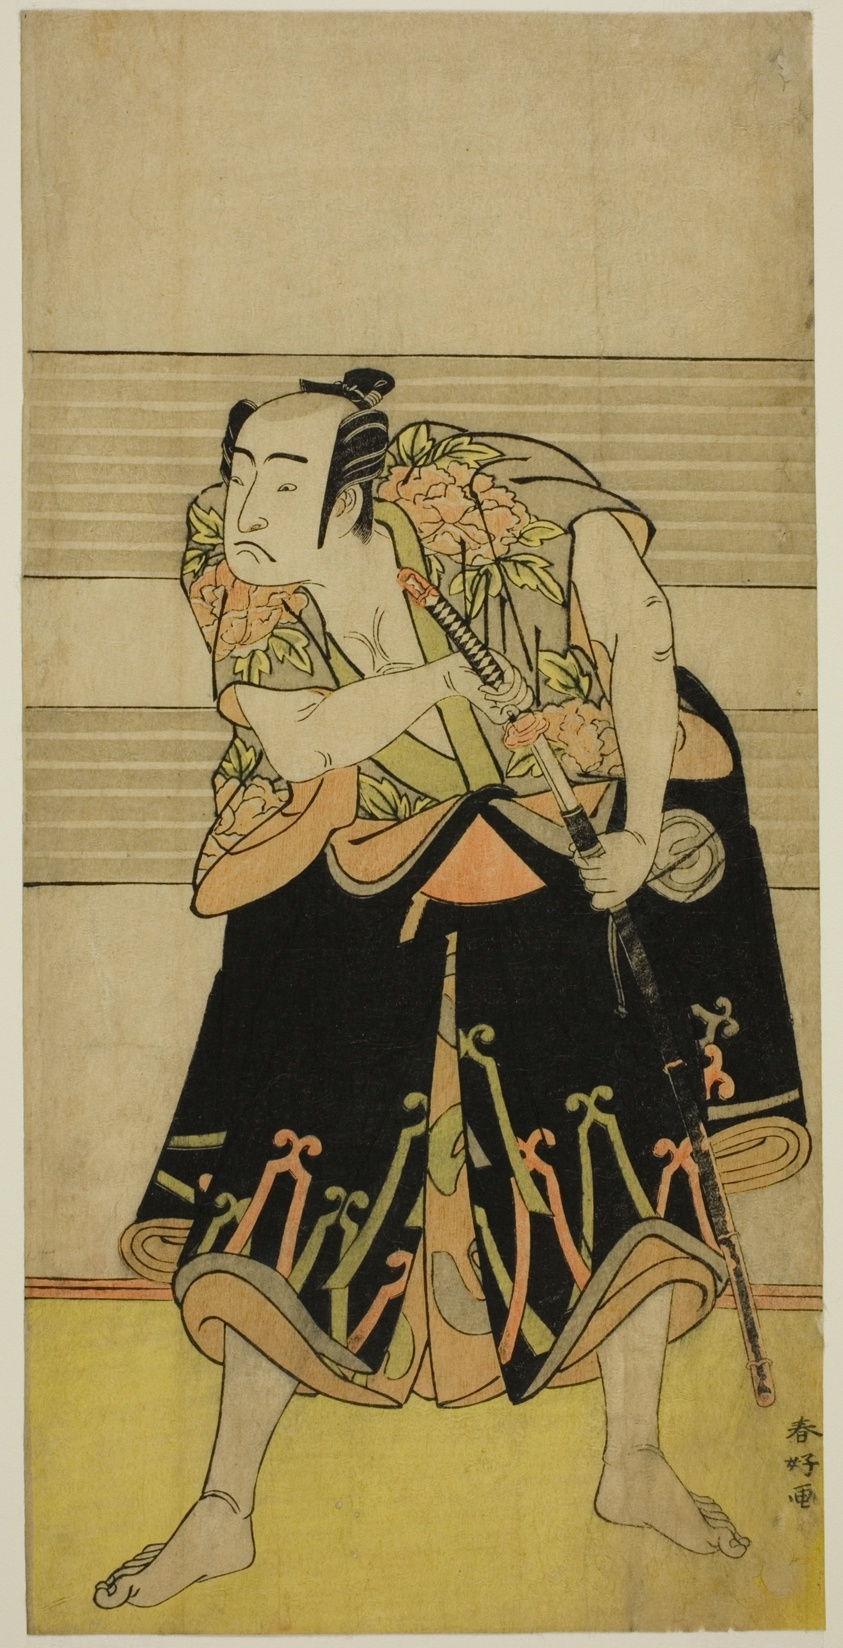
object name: Print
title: The Actor Sawamura Sojuro III in an Unidentified Role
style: Japanese (culture or style)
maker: Katsukawa Shunko I; Japanese, 1743-1812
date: c. 1781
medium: Color woodblock print; hosoban; from a multisheet composition (?)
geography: Japan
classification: woodblock print; print; asian art